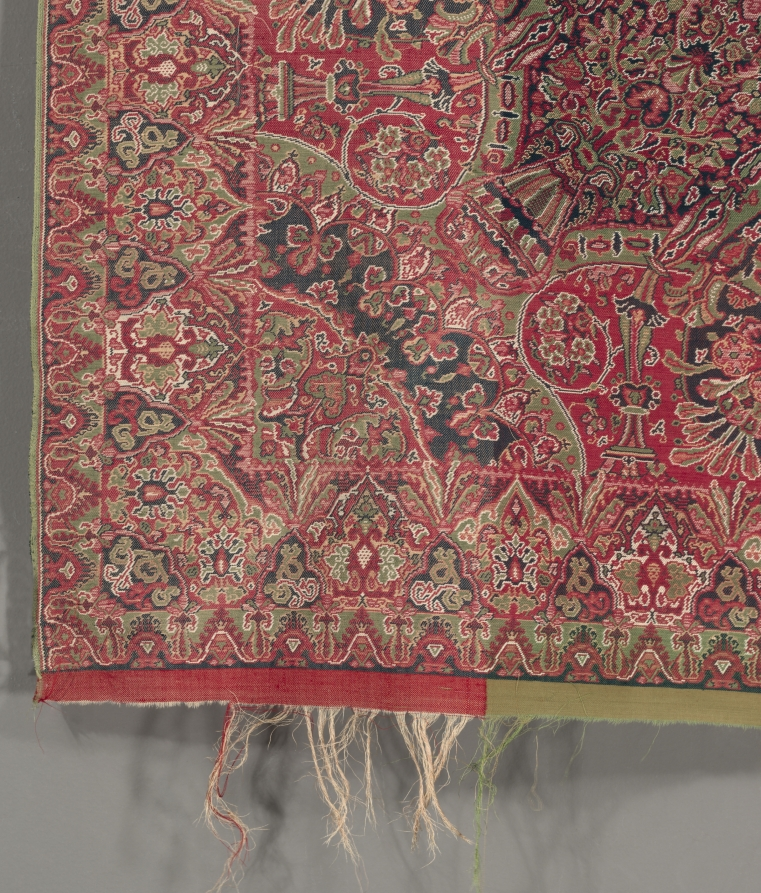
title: Square Shawl in Renaissance Style with Black Center and Quarter Shawl Layout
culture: France, Nimes; Scotland, Paisley or England, Norwich, 19th century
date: 1840s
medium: supplementary weft pattern; silk and cotton?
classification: Textile